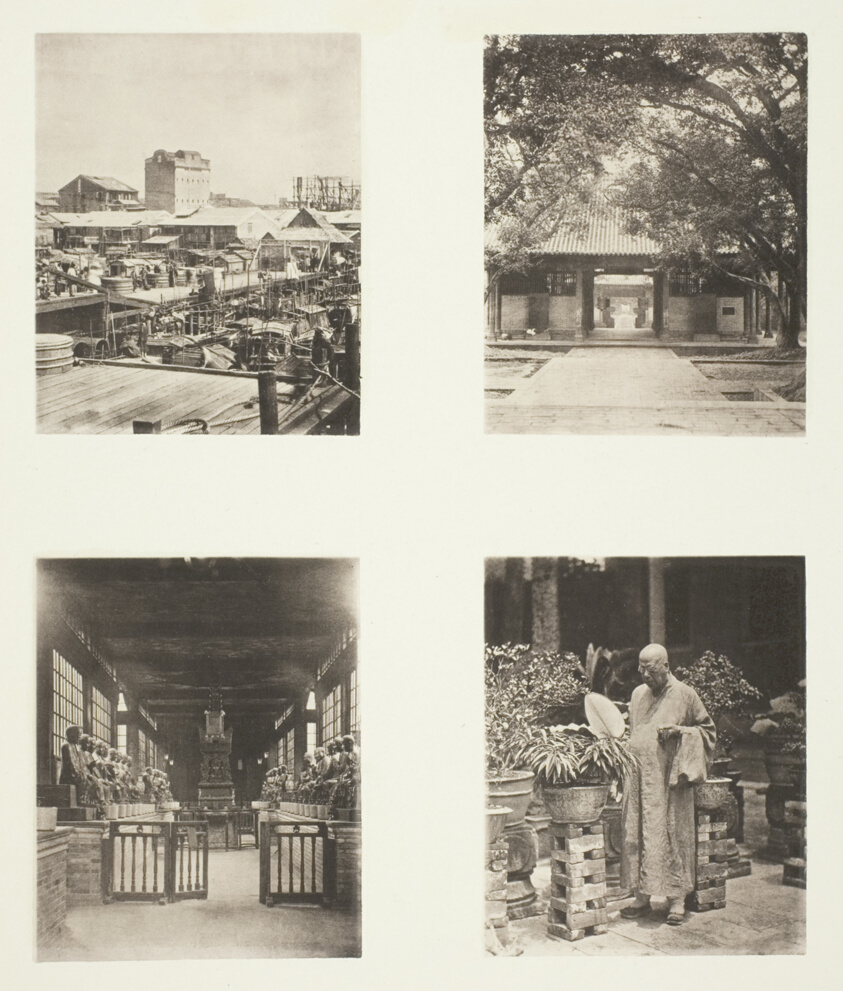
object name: Photograph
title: A Canton Pawn Shop; Honam Temple, Canton; Temple of Five Hundred Gods, Canton; The Abbot of the Temple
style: 19th century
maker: John Thomson (Scottish, 1837–1921)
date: c. 1868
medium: Collotype, pl. XVIII from the album "Illustrations of China and its People, Volume I" (1873)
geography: Scotland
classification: photography; photograph